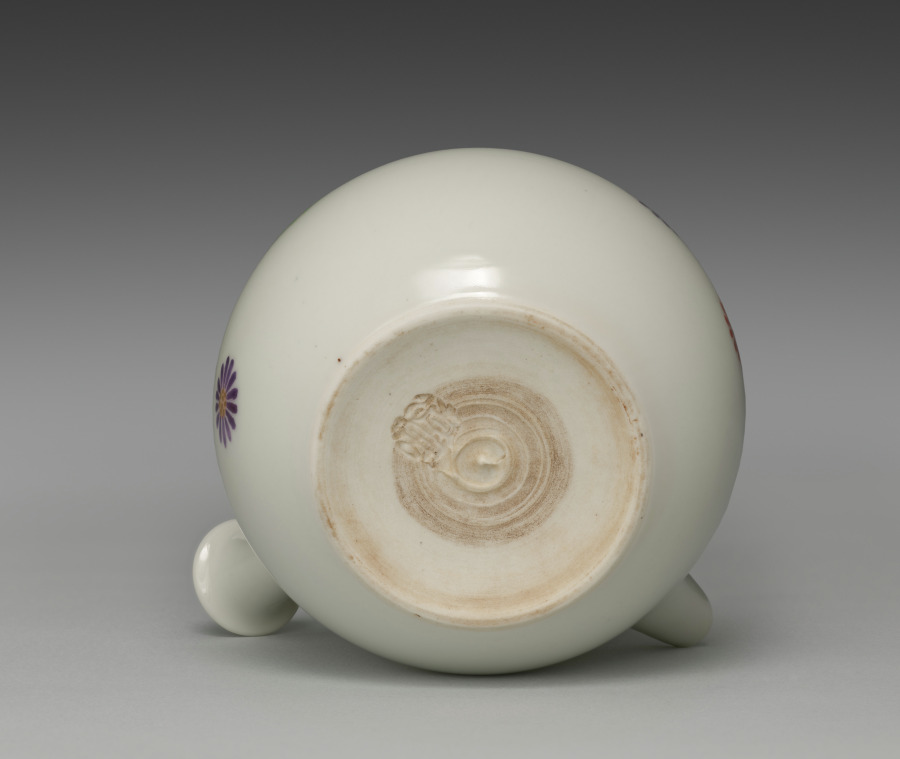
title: Teapot with Chrysanthemum Motifs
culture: Japan, Meiji period (1868–1912)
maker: Seifū Yohei III (Japanese, 1851–1914)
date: 1912–14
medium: Porcelain with overglaze color enamel and gold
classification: Ceramic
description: This side-handled sencha teapot has the lid flush against the body, forming an oblong orb. It is decorated with a sprinkling of similar chrysanthemum motifs in red, green, and purple overglaze color enamels with centers of pale red dotted with gold.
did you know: This teapot with chrysanthemum motifs shows off Seifū Yohei III’s technique of enamels painted over the glaze.